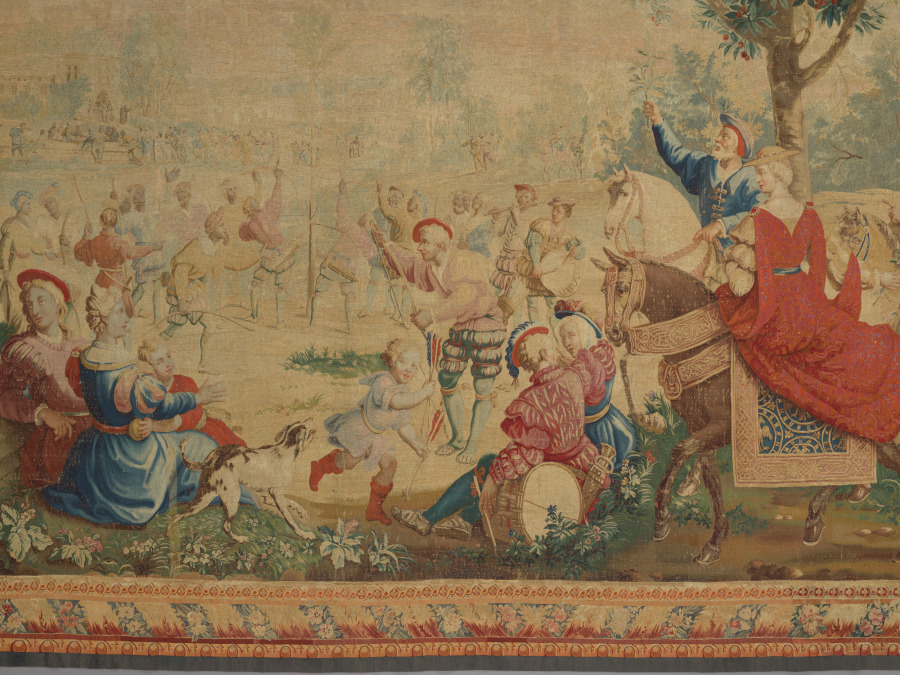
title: Month of May: Scene of May Day Festival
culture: France, 18th century, Period of Louis XV (1723-1774)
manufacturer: Gobelins Manufactory (France, Paris, est. 1662)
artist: Michel Audran (French, 1701–1771)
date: 1723–1774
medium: tapestry weave: linen warp, wool and silk wefts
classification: Tapestry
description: Seated spectators and splendidly clothed ladies and gentlemen on horseback watch May Day festivities in this tapestry. In the middle distance, archers prepare to shoot at a bush and bird placed atop a maypole, while more spectators congregate in the receding landscape. A border of rolled acanthus leaves and flower garlands frames the scene. This scene is one of twelve so-called Months of Lucas tapestries, each depicting activities that coincide with a month of the year. The original “Months of Lucas” was a sixteenth-century Flemish tapestry set that was owned by the French monarchy and mistakenly attributed to Lucas van Leyden during the 1600s. To this day, they continue to be known as the “Months of Lucas.” This original set was burned in 1797 so their gold and silver metal threads could be used to replenish the depleted French coffers. Beginning in the 1600s, the popular Months of Lucas were reproduced in several different versions under various masters at the Gobelins Manufactory in Paris, the famous royal production center for French tapestries since Louis XIV (1638–1715). The lower right hand corner of this tapestry bears the signature of Michel Audran (1701–1771), director of the Gobelins high-warp loom workshop from 1732–71, who produced this tapestry for a private patron in addition to the other royal commissions of the set.